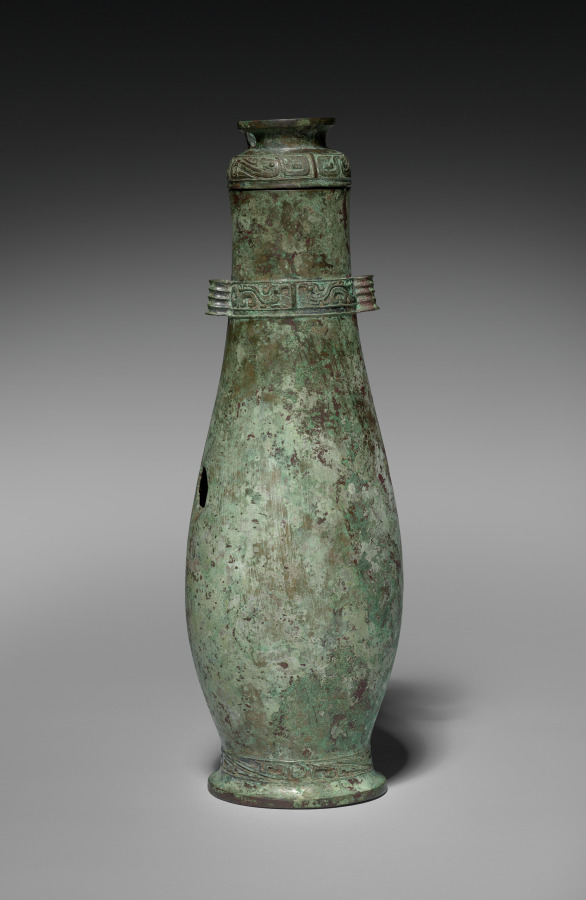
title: Wine Vessel (Hu)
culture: China, Western Zhou dynasty (c. 1046–771 BCE)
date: c. 1000–900 BCE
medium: bronze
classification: Metalwork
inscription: inscription inside top (cup): 事从作壺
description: This tall, slender bronze wine vessel, called a hu, has three bands of ornamentation: one above the foot, one around the neck, and one on the cover. Stylized birds or phoenixes are in the band around the neck, while the band on the cover and foot feature geometric dragons. The dragon and the phoenix may represent yin and yang and would be equally appropriate on a bronze of either secular or religious purposes. When inverted, the cover forms a cup. It likely held liquids like wine at festive banquets or religious ceremonies. The cylindrical "handles" at the neck band suggest that the vessel was carried by a cord.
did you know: This vessel was cast by the cire perdue, or lost wax, process.